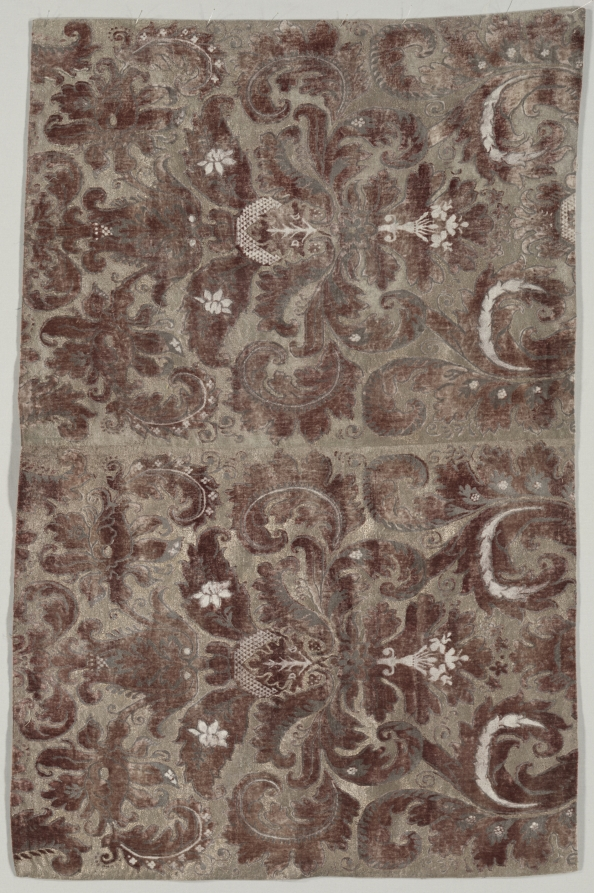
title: Two Joined Panels of "Fortuny Painted Velvet"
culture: Italy, Venice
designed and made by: Mariano Fortuny y Madrazo (Spanish, 1871–1949)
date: early 1920s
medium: velvet, painted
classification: Velvet